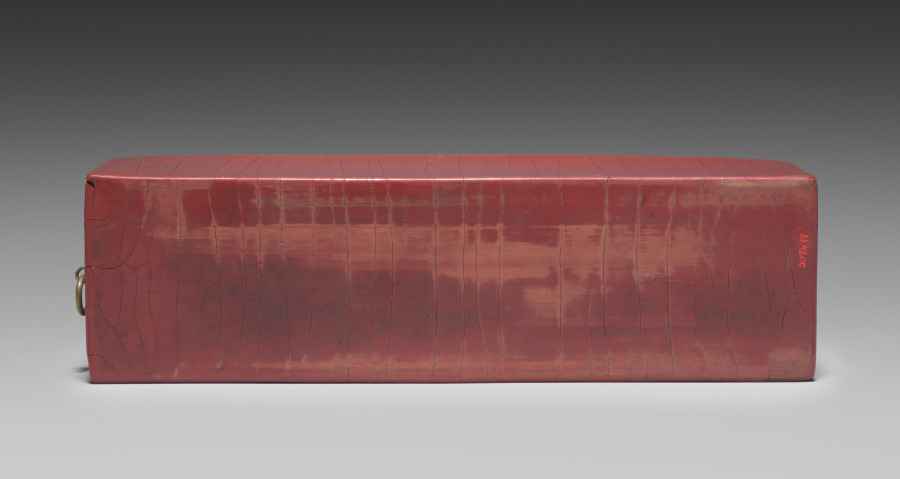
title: Drawer for a Tihong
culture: China, Ming dynasty (1368-1644), Wanli reign (1572-1620)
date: 1585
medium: carved cinnabar lacquer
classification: Lacquer